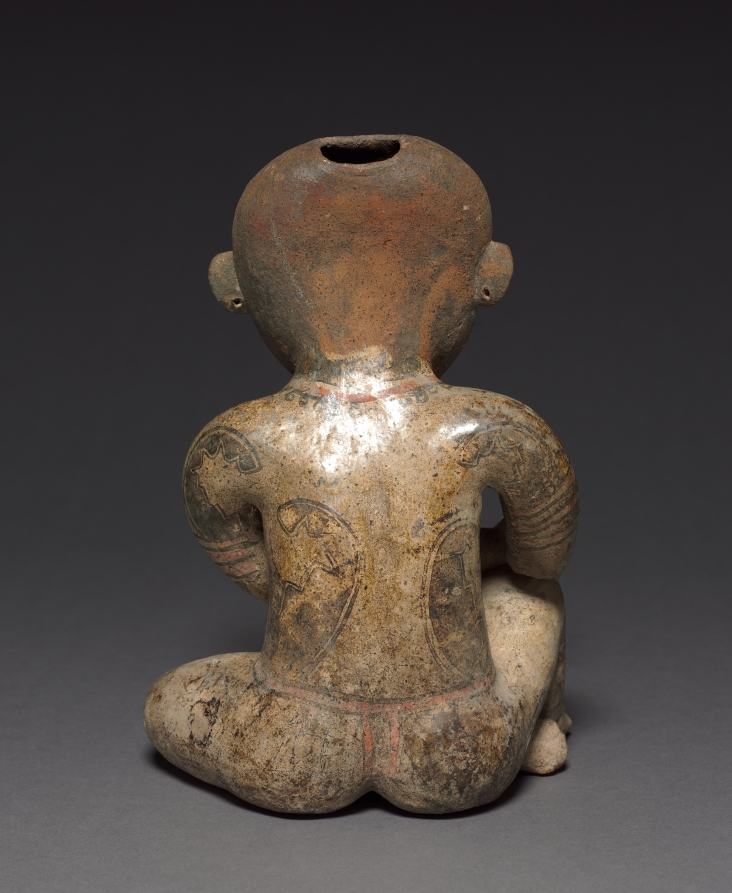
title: Seated Female Figure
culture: Mexico, Nayarit, Chinesco Style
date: c. 100 BCE–300 CE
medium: earthenware with burnished, colored slips and resist patterning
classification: Sculpture